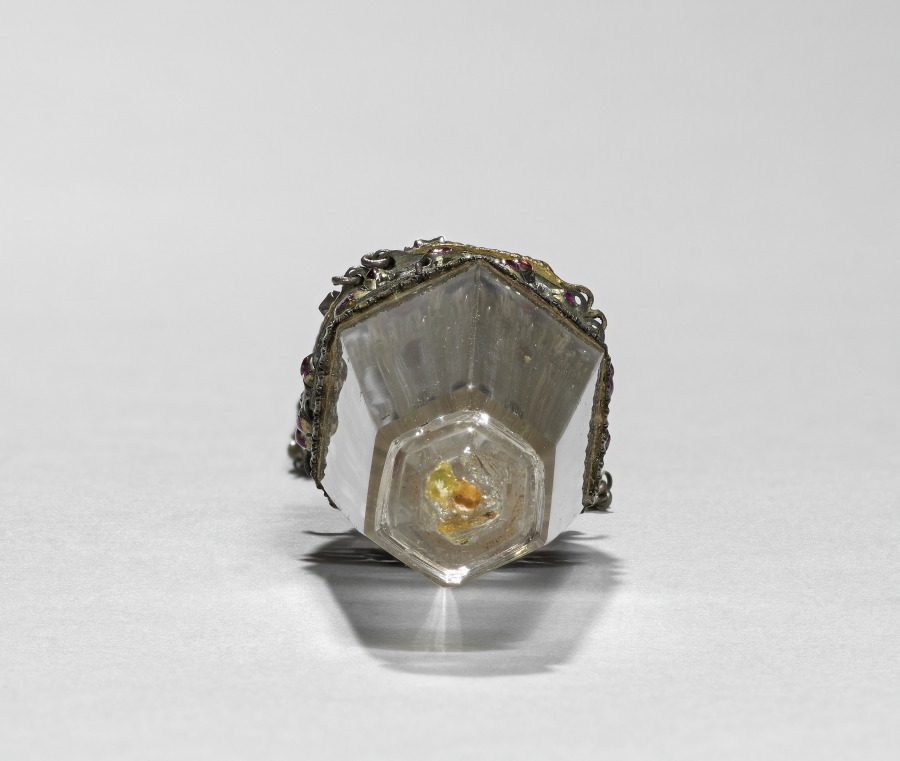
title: Scent Bottle (Vinaigrette)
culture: France, 19th century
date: 1800s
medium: glass mounted in silver (?) partially gilt and set with pink cabochon stones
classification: Miscellaneous